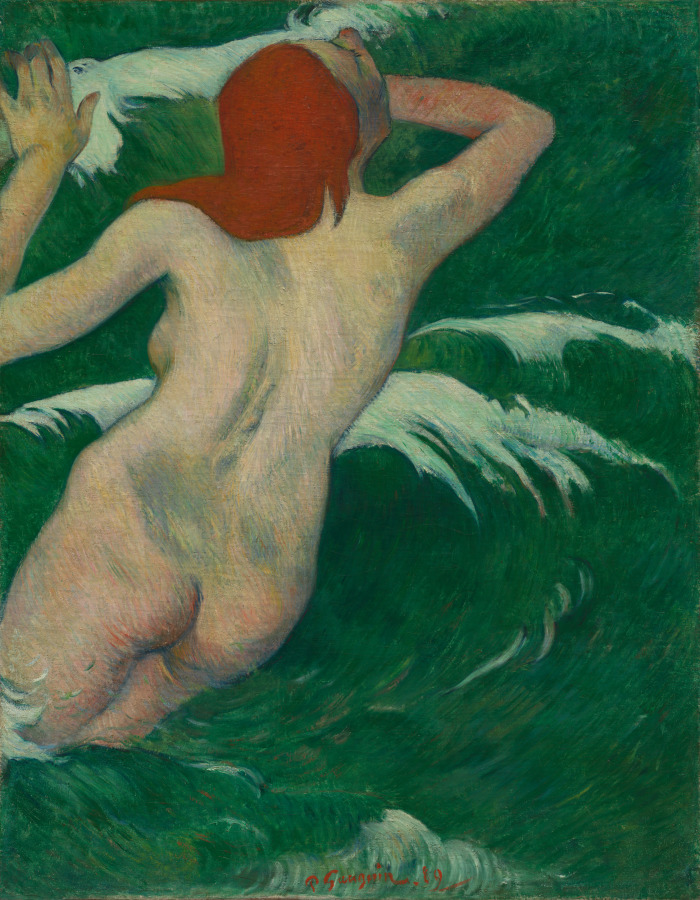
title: In the Waves (Dans les Vagues)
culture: France, 19th century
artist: Paul Gauguin (French, 1848–1903)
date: 1889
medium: oil on fabric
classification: Painting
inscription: Signed lower center: P Gauguin. 89-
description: Painted at Pont-Aven in northwest France, this depiction of a nude figure throwing herself into the sea suggests a metaphor for a modern European woman forsaking civilization and abandoning herself to her natural, primitive instincts. The simplified lines and exaggerated colors, especially the contrasting green and orange, seem invented rather than observed from life. Exhibiting the painting at the Café Volpini in Paris in 1889, Gauguin established himself as a leader of the Symbolist movement in art.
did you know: Gauguin likely painted this work of art during his time in a small coastal village called Pont-Aven where he sought to immerse himself in nature and escape modern civilization.